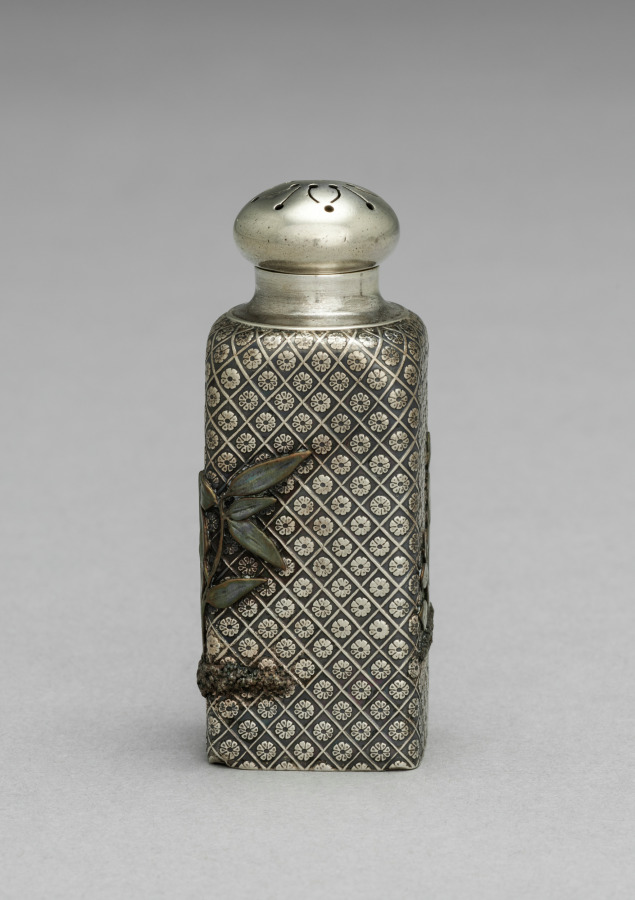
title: Salt Shaker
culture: America, Rhode Island, Providence, 19th century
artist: Gorham Manufacturing Company (America, est. 1831)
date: c.1875–1885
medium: silver and mixed metals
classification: Silver